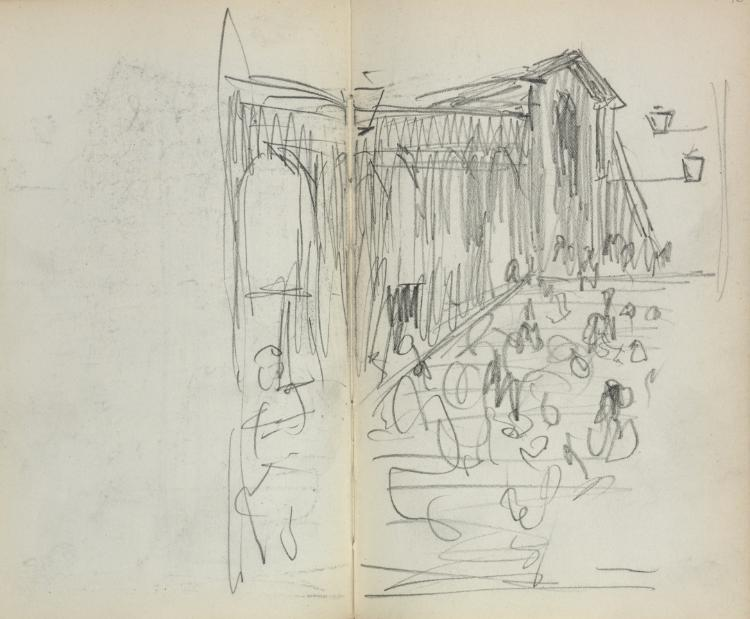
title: Italian Sketchbook: Bridge with Figures (page 95 & 96)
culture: America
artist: Maurice Prendergast (American, born Newfoundland [now Canada], 1858–1924)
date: 1898–1899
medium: pencil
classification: Bound Volume